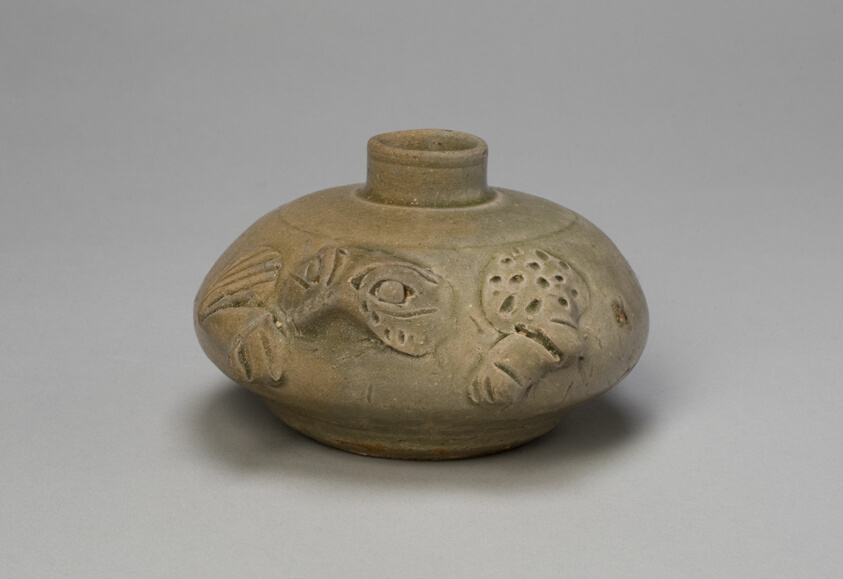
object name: Vessel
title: Frog-Shaped Jarlet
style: Chinese (culture or style)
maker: China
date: Western Jin dynasty (265–316), late 3rd century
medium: Yue ware; stoneware with underglaze molded decoration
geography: China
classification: stoneware; asian art; ceramics; vessel